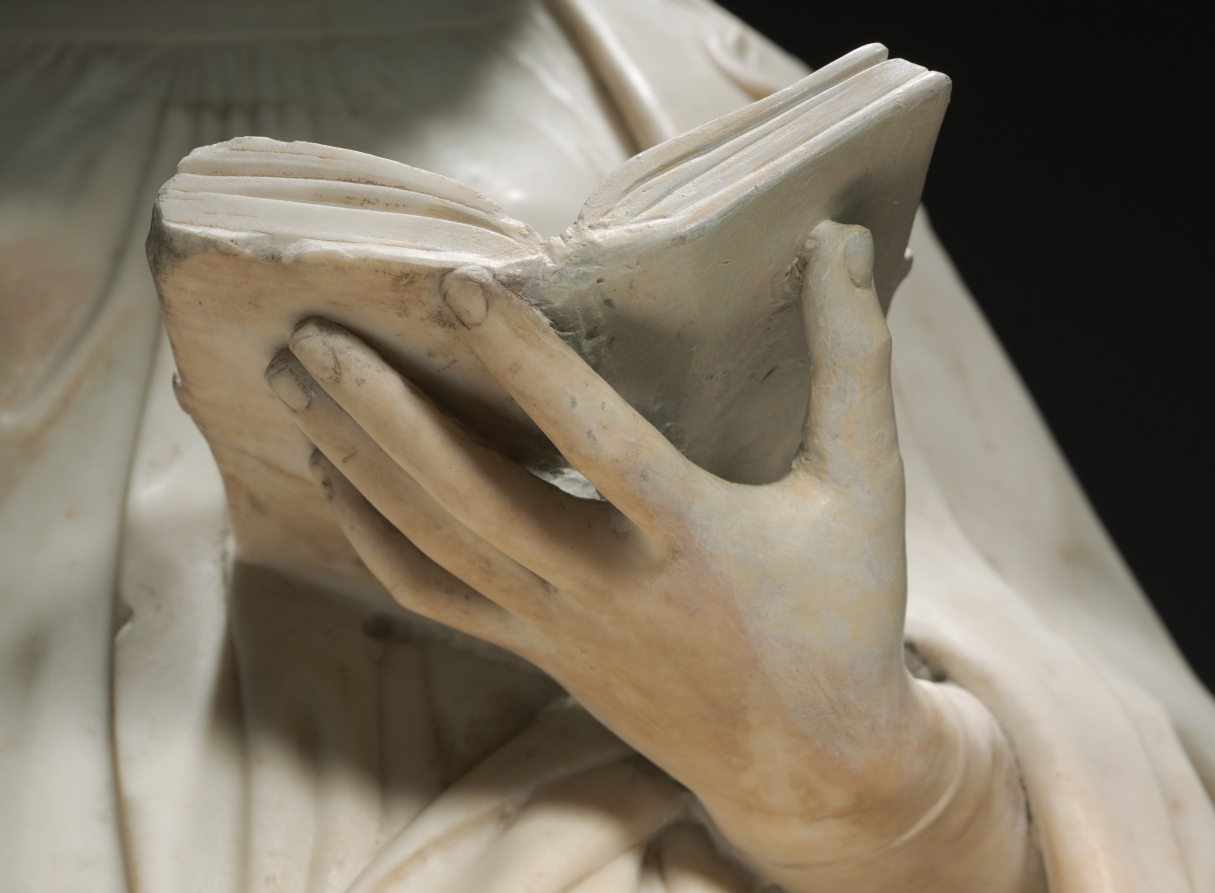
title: Saint Margaret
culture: Italy, Sicily, Palermo, 16th century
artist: Antonello Gaggini (Italian, 1478–1536)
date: c. 1520–1530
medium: marble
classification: Sculpture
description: Gaggini was a member of a large family of sculptors whose Palermo workshop supplied monumental religious sculptures for the cathedrals of Palermo and Messina in Sicily and Montelione in Calabria. After 1507 Antonello himself worked for 15 years to produce marble sculptures for Palermo Cathedral. This figure of the legendary virgin martyr, Saint Margaret, was probably commissioned for one of these ecclesiastical foundations, possibly the chancel of Palermo Cathedral. The saint is shown reading from a book of hours (a sign of her piety) and trampling upon a dragon, the symbol of Satan. The dragon became the attribute by which she is recognized in sacred art.